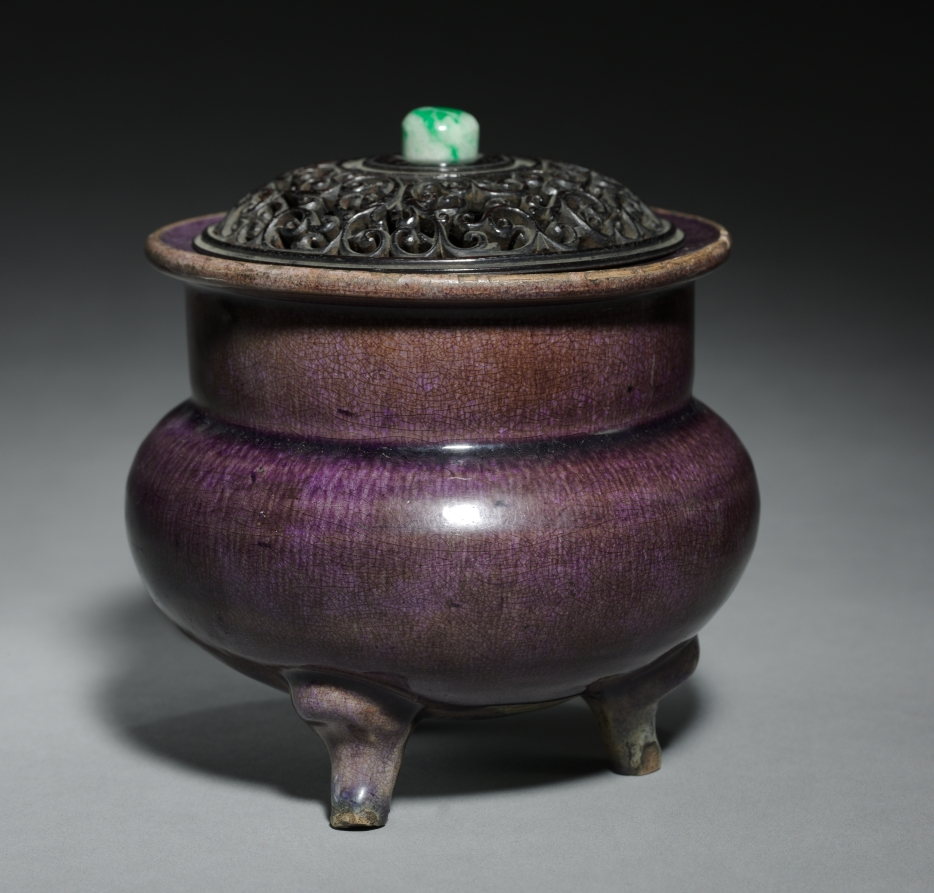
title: Tripod: Ding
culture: China, Ming dynasty (1368–1644)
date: 1368–1644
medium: porcelain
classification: Ceramic